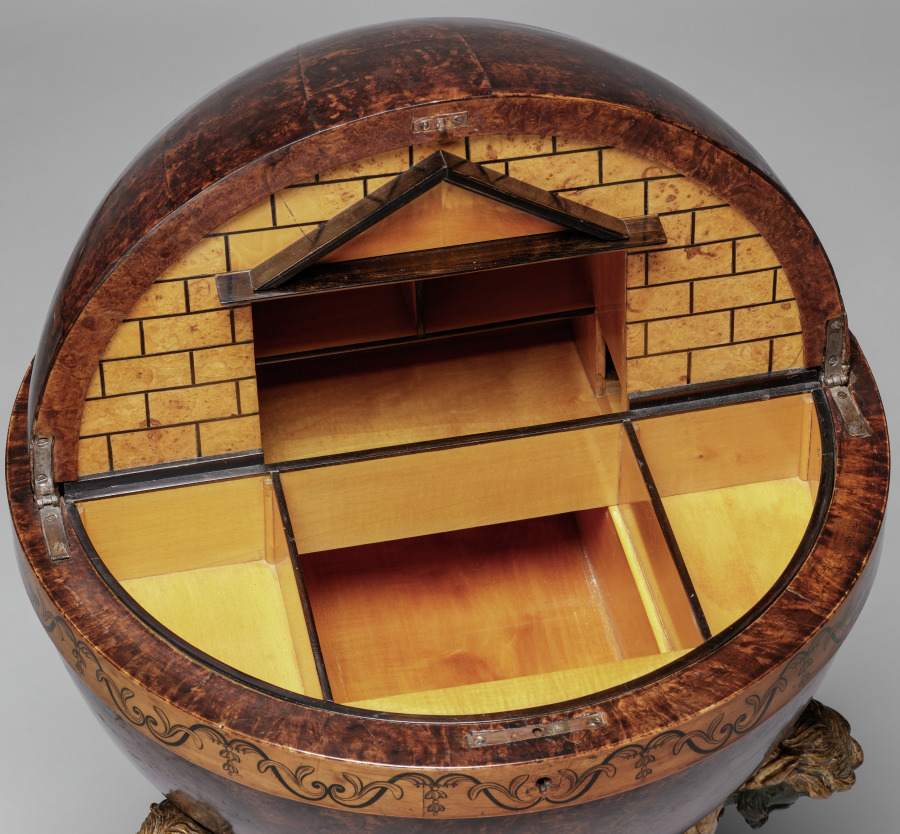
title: Globe Sewing Table (Globustisch)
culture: Austria, Vienna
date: c. 1800–1810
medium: Burl walnut veneer, mahogany, ebony, satinwood, gilt wood, painted wood; mirrored glass; metal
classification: Furniture and woodwork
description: Work tables resembling globes were the usual form for a lady's sewing or writing table around 1800 in Austria. Combining moving parts, secret compartments, and highly finished decoration, these tables were also a way for the cabinetmaker to show off his skill. The tripod supports and temple-like architectural quality of both the exterior and interior decoration reflect the fashionable taste for neoclassical style, or Biedermeier as it was called in Austria, where Vienna was the center of such elaborate furniture production.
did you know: The top half of the globe rotates upward to reveal hidden compartments for sewing tools, threads, and unfinished fabric pieces.